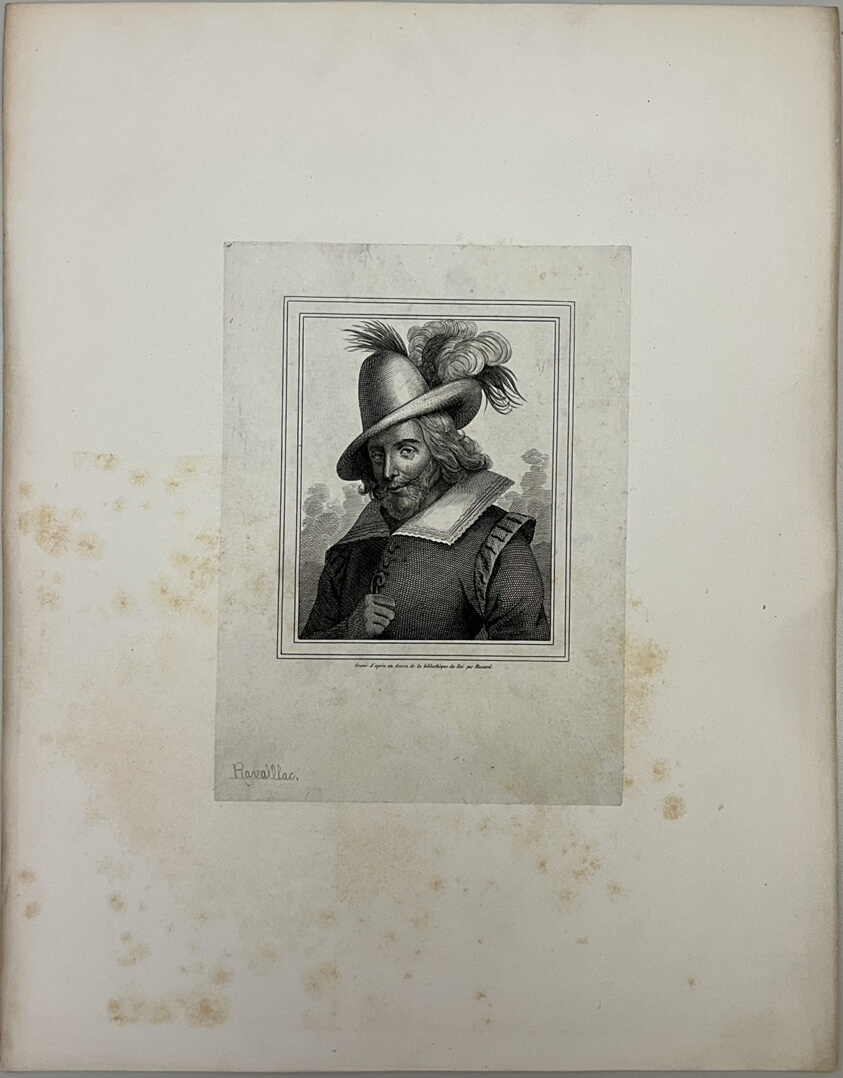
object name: Print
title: François Ravaillac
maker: Urbain Massard (French, 1775-1843); after Artist Unknown (French, 19th century)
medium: Steel engraving on paper laid on paper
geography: France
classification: reproduction; print; prints and drawing